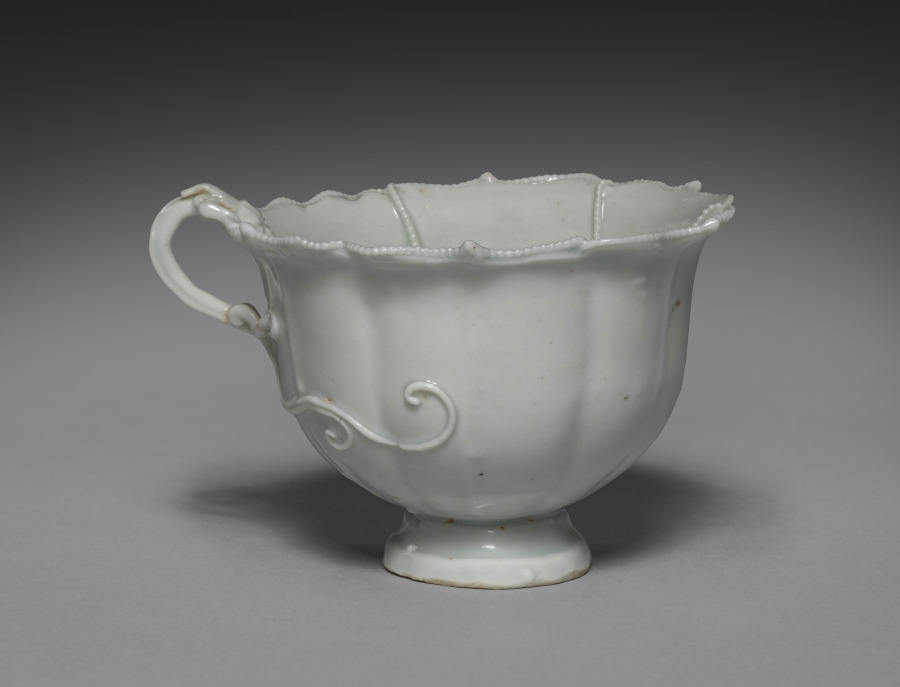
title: Fluted Cup with Dragon Handle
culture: China, Jiangxi Province, Jingdezhen kilns, Yuan dynasty (1271–1368)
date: early 1300s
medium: Glazed porcelain, Qingbai (bluish-white) ware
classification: Ceramic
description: Very thinly potted, the subtly lobed body of this cup is almost translucent. The thin, slightly opaque, light greenish glaze lends a sugary shine. Applied elements, including the handle, beaded borders, and sculptural floret, are constructed and glazed with the same materials as the body, providing a seamless blend of form and decorative embellishment. The result is an evocative reminder of slightly earlier silver cups, also created in the form of flowers. This pristine, natural construction is challenged, however, by the archaic dragon that acts as the handle. Borrowed from the decoration found on much earlier bronzes, this added form illustrates the eclecticism of the Yuan, the attempt to blend present vision with interest in the past.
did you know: Clay beading divides the cup's interior into six foliate panels with a six-petaled flower at the junction of the beaded lines.